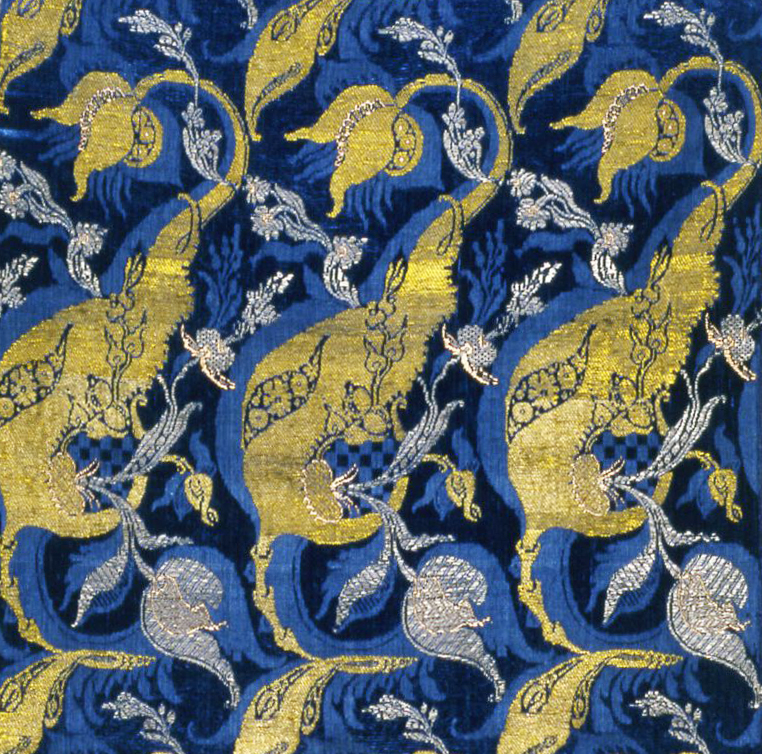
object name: Textile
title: Two Panels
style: "bizarre" style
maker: France, provincial, possibly Nimes or Avignon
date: 1707/08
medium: Silk and gilt- and silvered-metal-strip-wrapped silk, satin weave with brocading wefts and self-patterned by areas of plain weave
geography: France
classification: textile; weaving